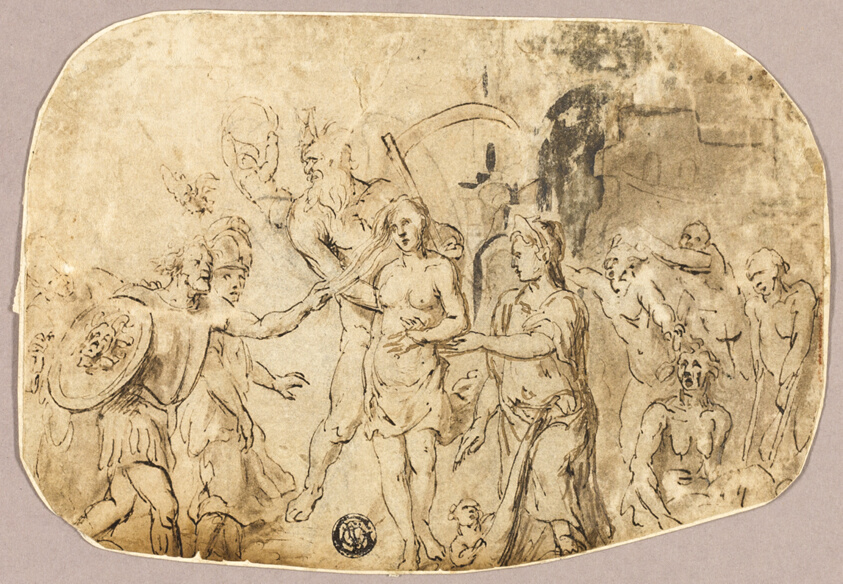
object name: Drawing and Watercolor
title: Father Time Taking Maiden from Soldier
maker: Unknown Artist; British or Italian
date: 17th century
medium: Pen and brown ink, with brush and brown wash, heightened with lead white (discolored), over black chalk, on tan laid paper, laid down on ivory laid paper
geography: Italy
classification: pen and ink drawings; drawings (visual works); prints and drawing